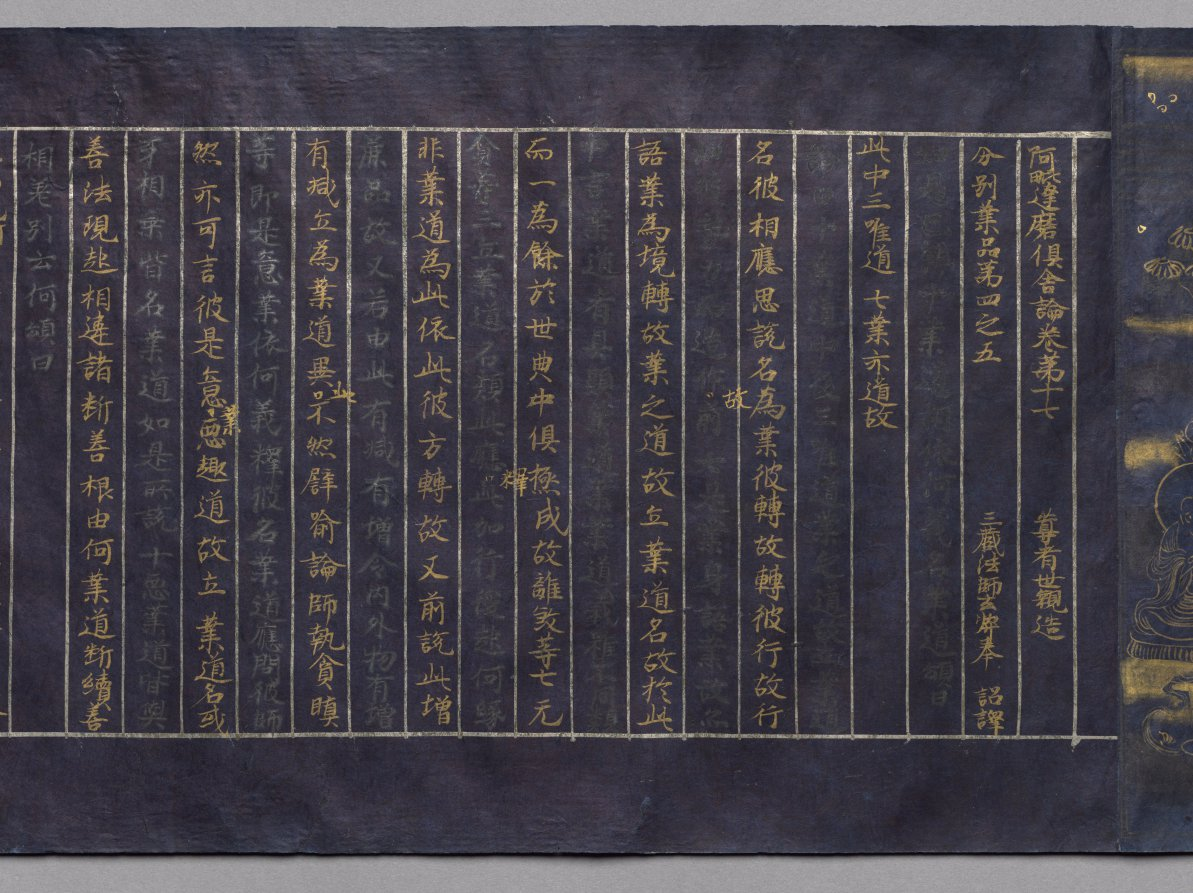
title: Meta-Discourse on the Teachings from the Treasury (Abidharmakosha-Bhashya)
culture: Japan, Heian period (794–1185)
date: 1100s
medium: handscroll; gold and silver on indigo-dyed paper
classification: Manuscript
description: This religious text relates some of the teachings of the great fourth-century Indian Buddhist scholar Vasubhandhu. The text analyzes human consciousness in its relationship to the environment and transformations that occur during meditation. This scroll is the 17th part of a 30-part translation of the text by Xuanzang, an eminent seventh-century Chinese monk.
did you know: The frontispiece depicts the Buddha Shakyamuni preaching in a paradisical landscape.